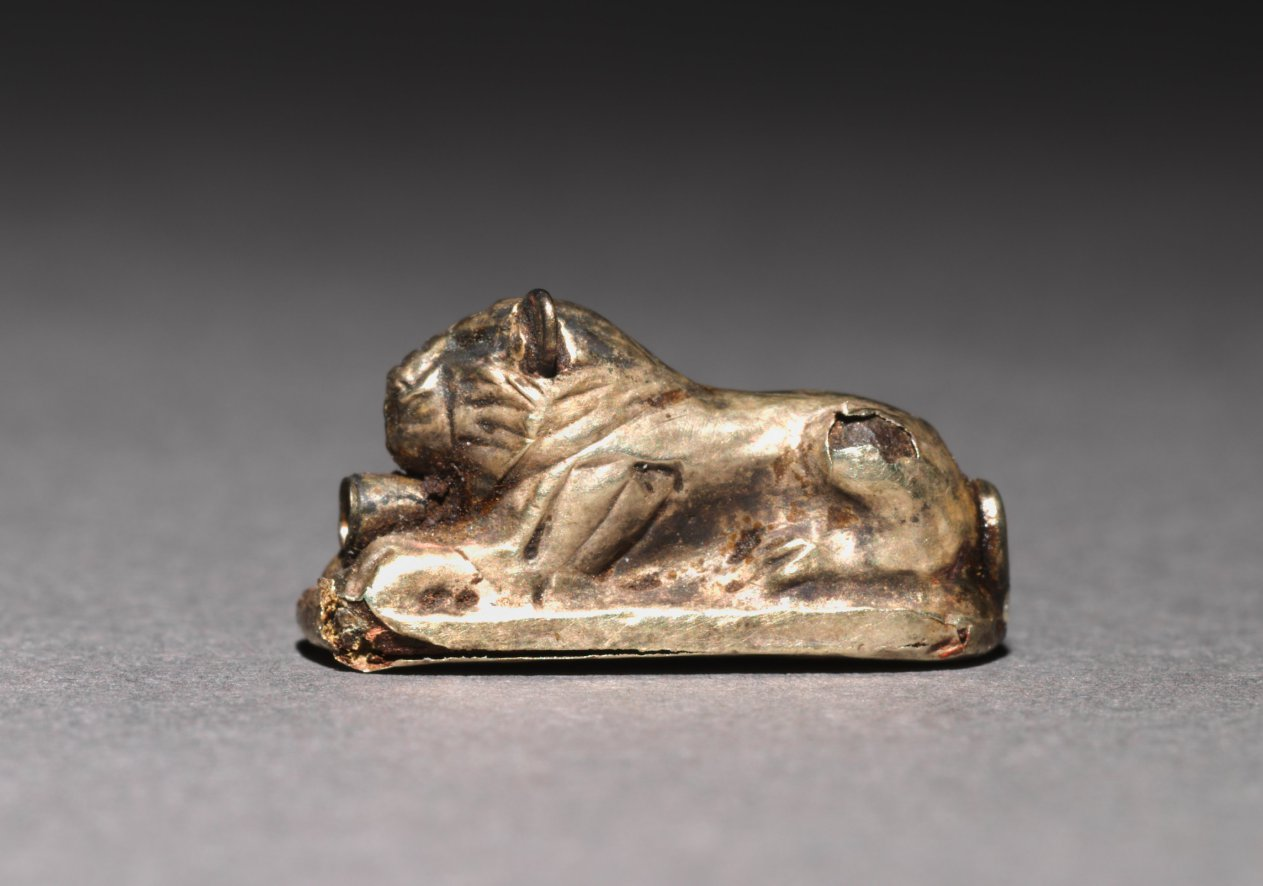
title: Recumbent Lion Bead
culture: Egypt, Middle Kingdom (2040–1648 BCE), Dynasty 12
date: 1980–1801 BCE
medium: electrum over a clay-bulked resin core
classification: Amulets